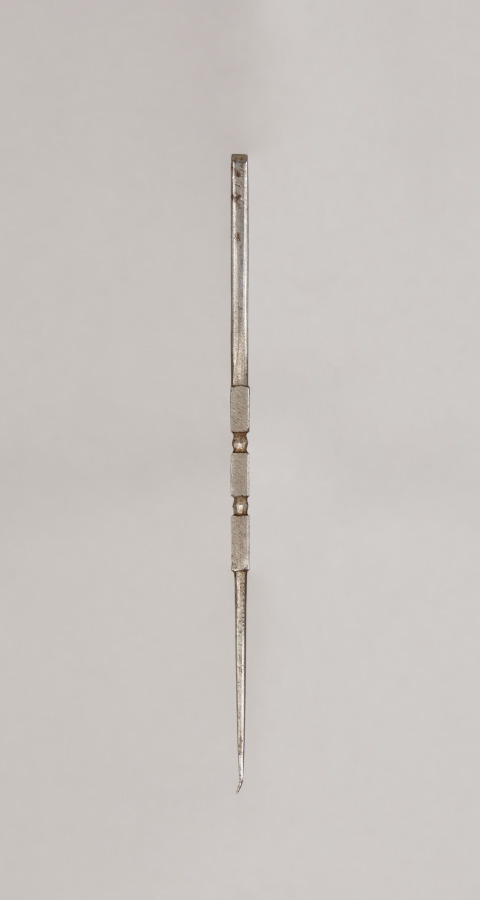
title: Scabbard Tweezers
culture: Africa, Sudan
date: 1880–1910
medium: metal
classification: Arms and Armor